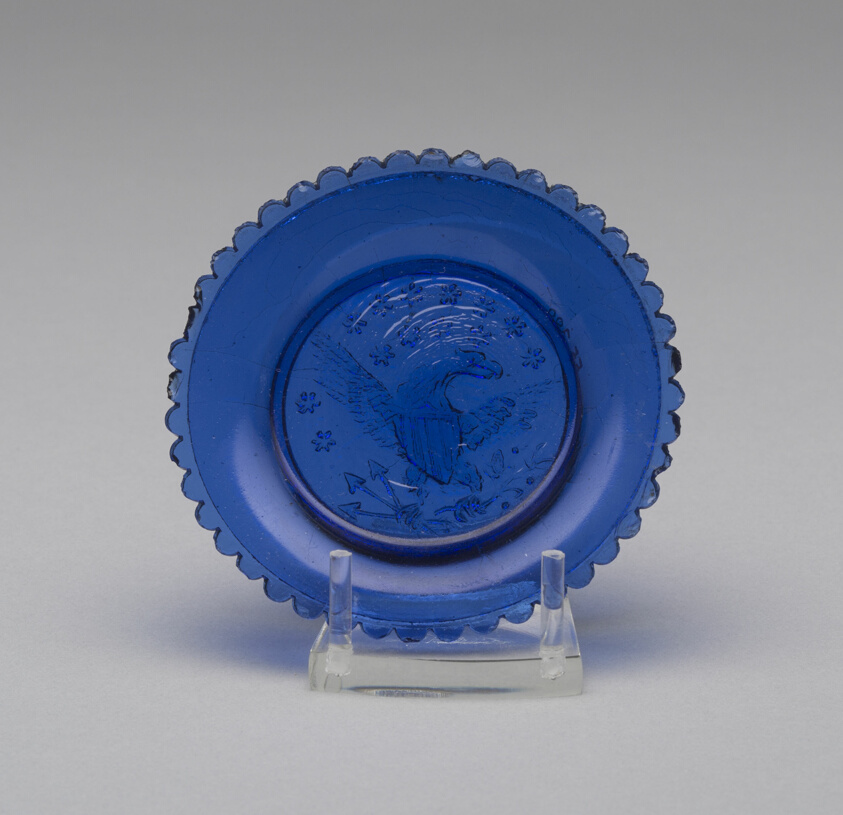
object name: Glass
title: Cup plate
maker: Artist unknown (American, 19th century); Midwest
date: 1830–35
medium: Pressed glass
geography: Midwest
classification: plate (general, dish); glass; american decorative arts; american arts; decorative arts